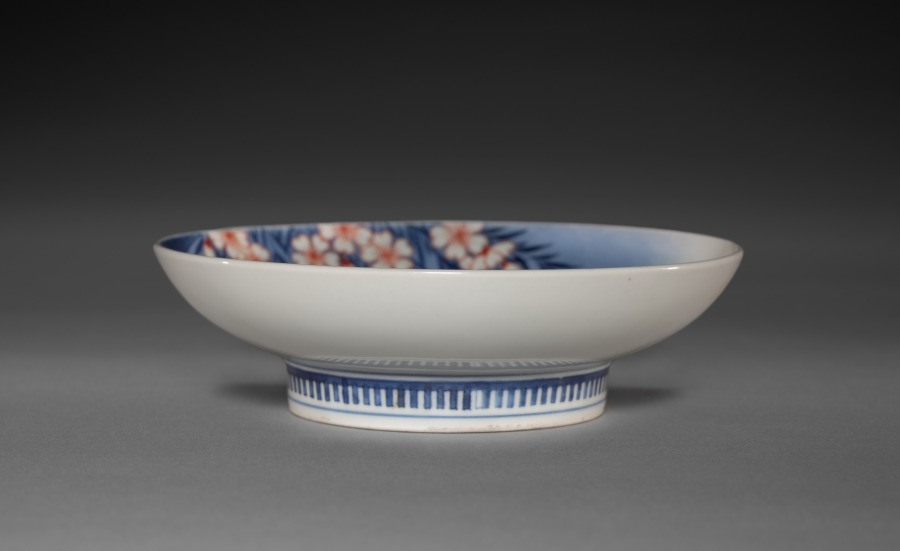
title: Dish with Weeping Cherry Tree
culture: Japan, Meiji period (1868–1912)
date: late 1800s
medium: Porcelain with underglaze blue and overglaze red enamel (Hizen ware, Nabeshima type)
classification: Ceramic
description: This dish depicts a cherry tree (sakuragi) whose flower-laden branches are the centerpiece while the sliver of a trunk and roots appear on the left edge. The sakura blossoms are delicately depicted in an iron-red overglaze. The flowers’ various positions (facing out and downward) and stages of maturity (bud and full bloom) enhance the naturalism and dynamism of the image.